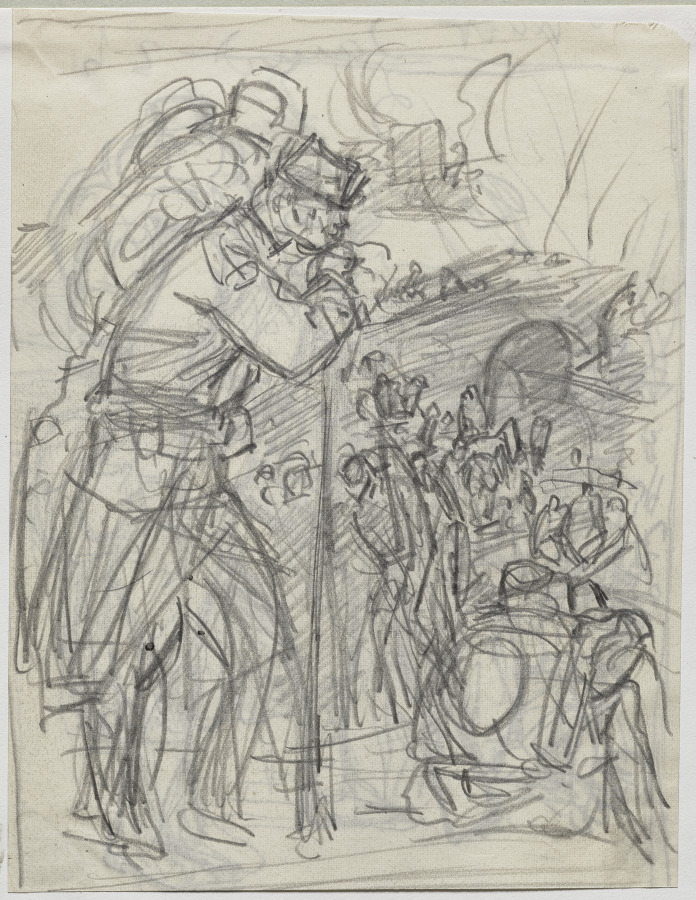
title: La Retraite après Charleroi...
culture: France, 20th century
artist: Auguste Louis Lepère (French, 1849–1918)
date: 1914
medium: pencil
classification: Drawing